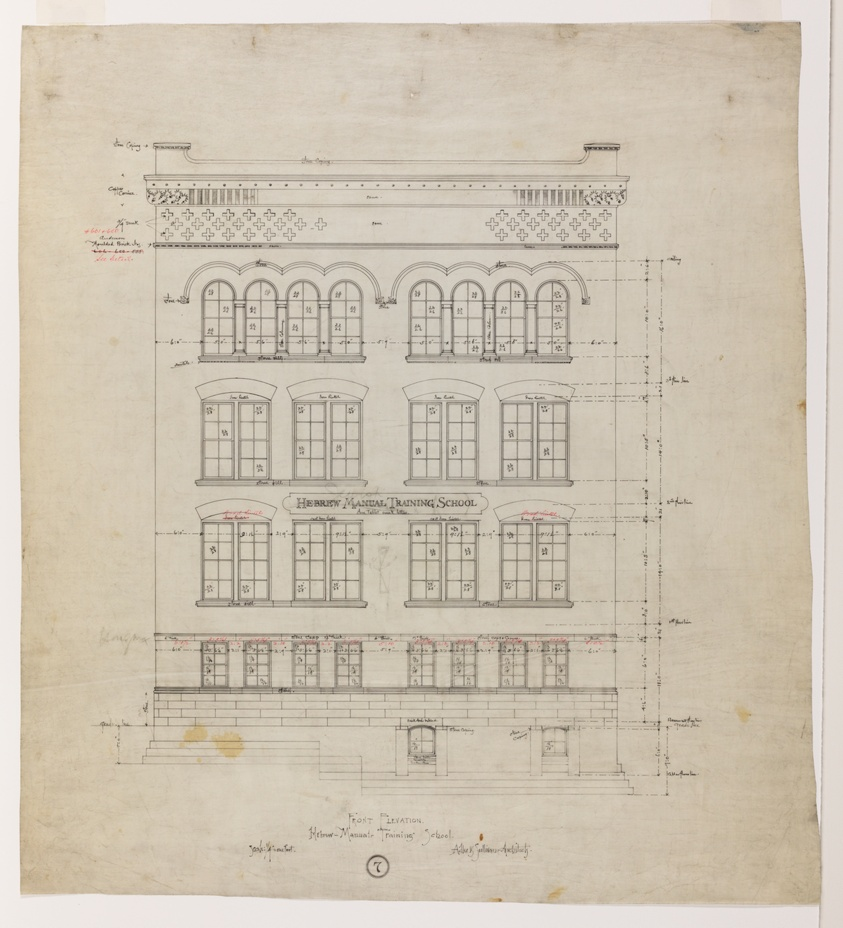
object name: Architectural Drawing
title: Hebrew Manual Training School, Chicago, Illinois, Front Elevation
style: 19th century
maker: Adler and Sullivan; American, 1883-1895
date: 1889/90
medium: Black ink on linen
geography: 12th Place, 554 West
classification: architectural drawing; architecture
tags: schools, Judaism, elevation, Chicago